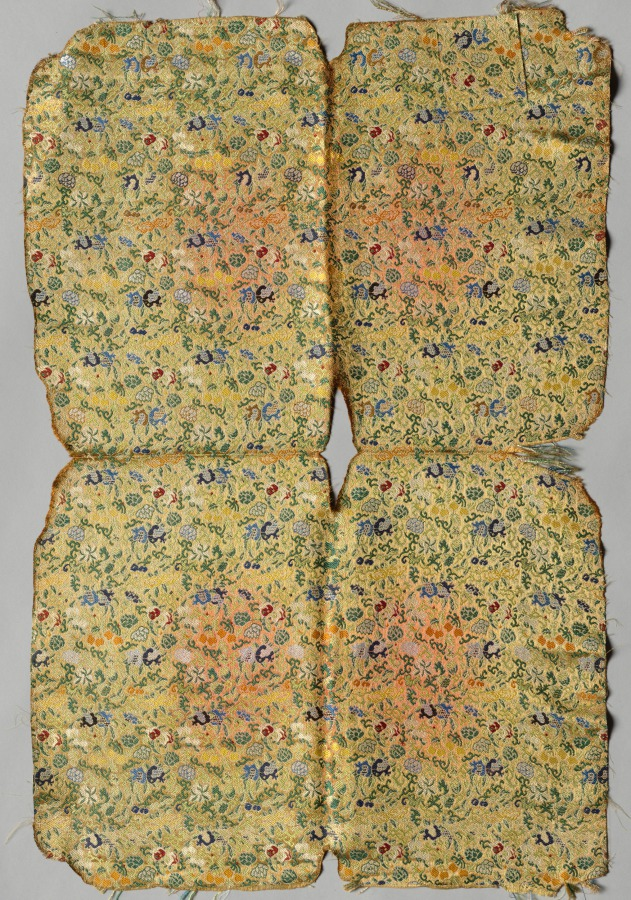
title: Fragment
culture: China, Qing dynasty (1644-1911)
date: 1800s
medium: Silk; damask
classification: Textile